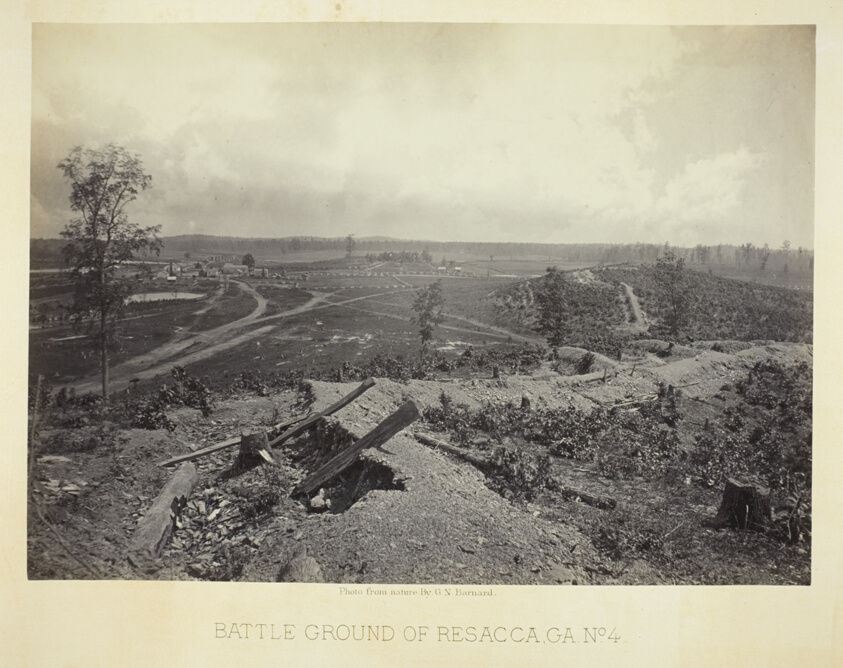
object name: Photograph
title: Battle Ground of Resacca, GA, No. 4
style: 19th century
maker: George N. Barnard (American, 1819–1902)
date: 1866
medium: Albumen print, plate 22 from the album "Photographic Views of the Sherman Campaign" (1866)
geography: United States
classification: albumen silver print; photographic process; photography; photograph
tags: Collected by Hugh Edwards, Sherman's Campaign 1866